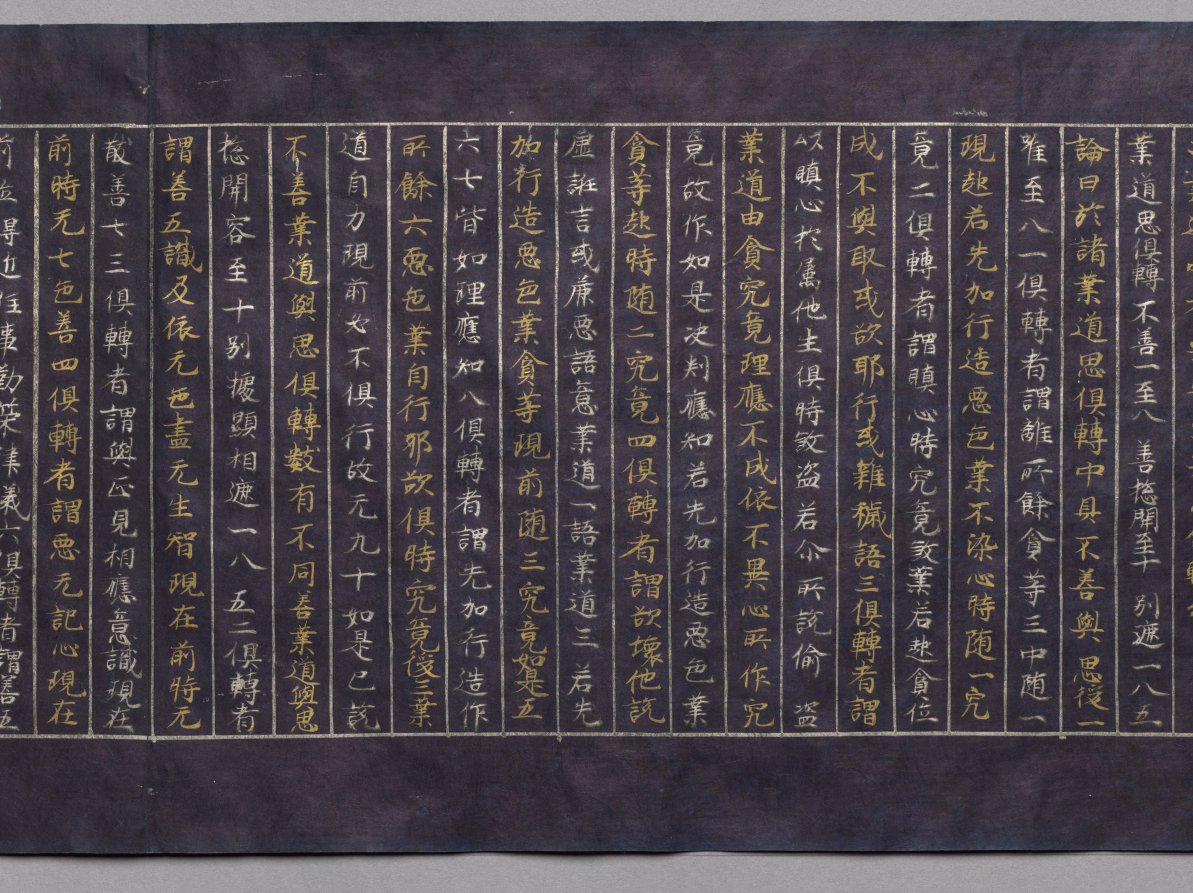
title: Meta-Discourse on the Teachings from the Treasury (Abidharmakosha-Bhashya)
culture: Japan, Heian period (794–1185)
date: 1100s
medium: handscroll; gold and silver on indigo-dyed paper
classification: Manuscript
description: This religious text relates some of the teachings of the great fourth-century Indian Buddhist scholar Vasubhandhu. The text analyzes human consciousness in its relationship to the environment and transformations that occur during meditation. This scroll is the 17th part of a 30-part translation of the text by Xuanzang, an eminent seventh-century Chinese monk.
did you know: The frontispiece depicts the Buddha Shakyamuni preaching in a paradisical landscape.